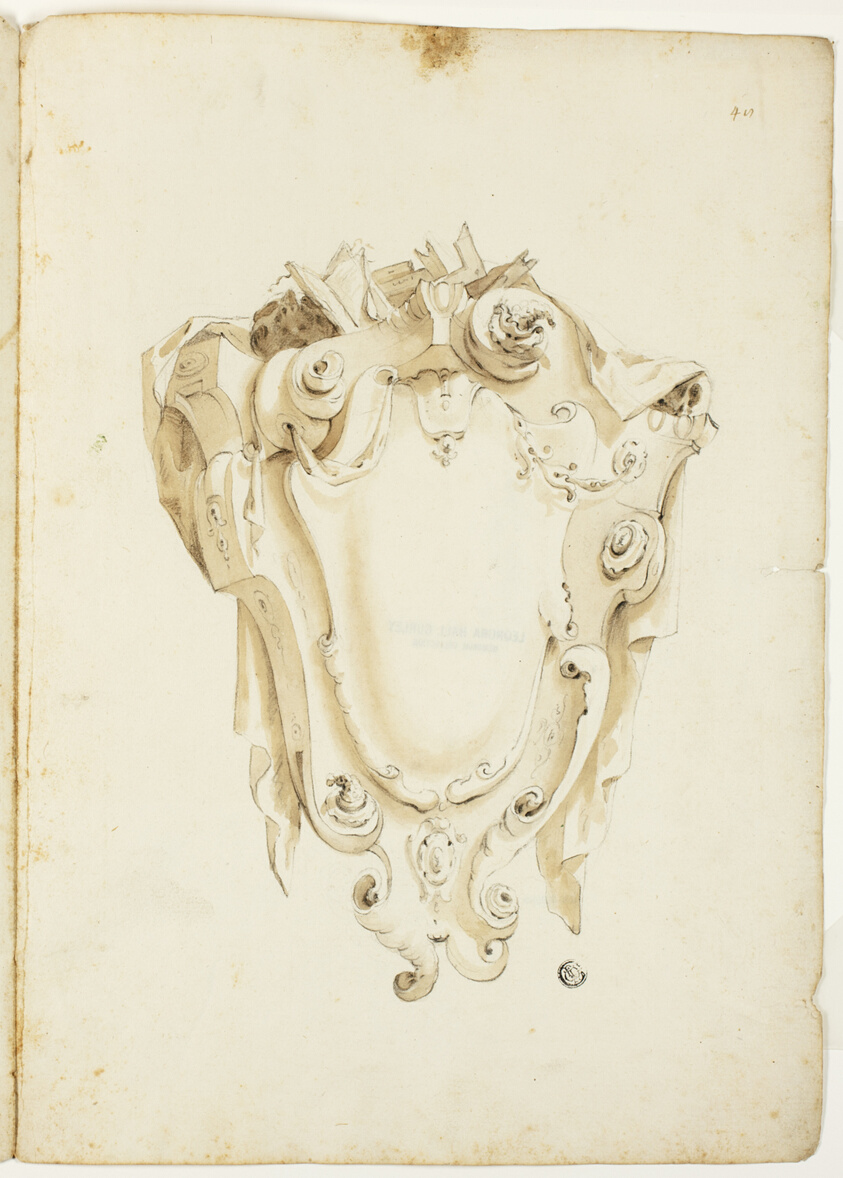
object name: Drawing and Watercolor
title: Design for Escutcheon, with Skulls and Books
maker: Unknown Artist; possibly Italian or German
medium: Black chalk and brush and brown wash on ivory laid paper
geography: Italy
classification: chalk; drawings (visual works); prints and drawing